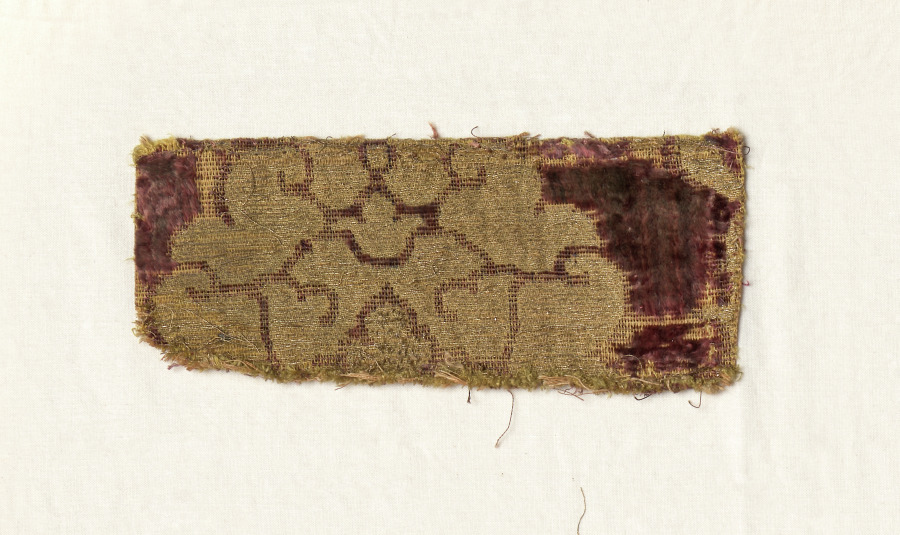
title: Fragments from Chasuble Front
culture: Italy, early 16th century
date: early 1500s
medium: velvet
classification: Velvet